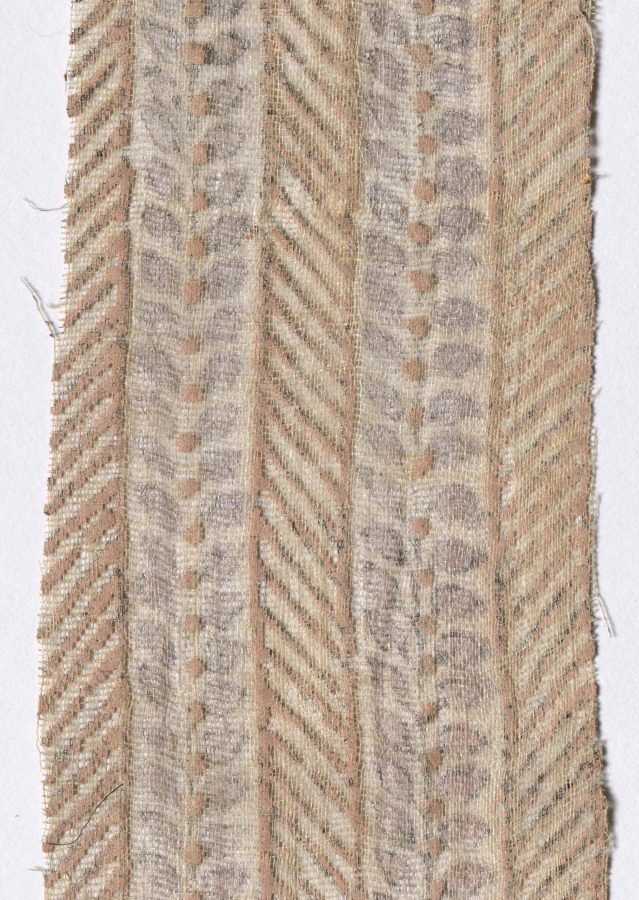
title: Fragment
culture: India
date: 1700s–1800s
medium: Block printed and overpainted with gold leaf (varak) on undyed plain weave cotton muslin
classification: Textile